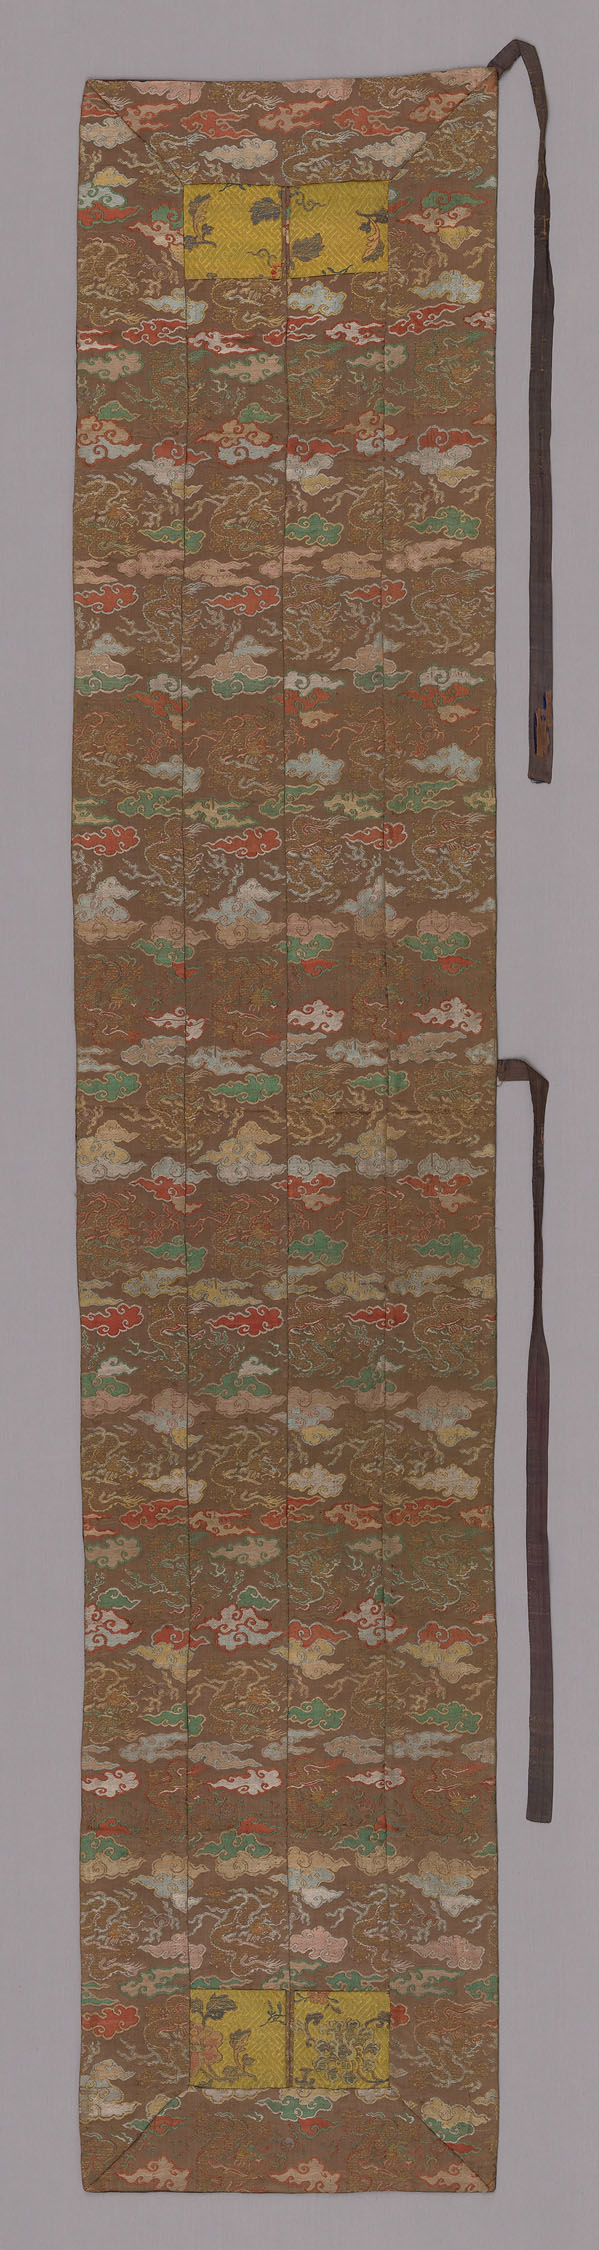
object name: Textile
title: Ôhi (Stole)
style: edo (japanese period), Japanism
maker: Japan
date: Edo period (1615–1868), 1775/1825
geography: Japan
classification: textile; weaving